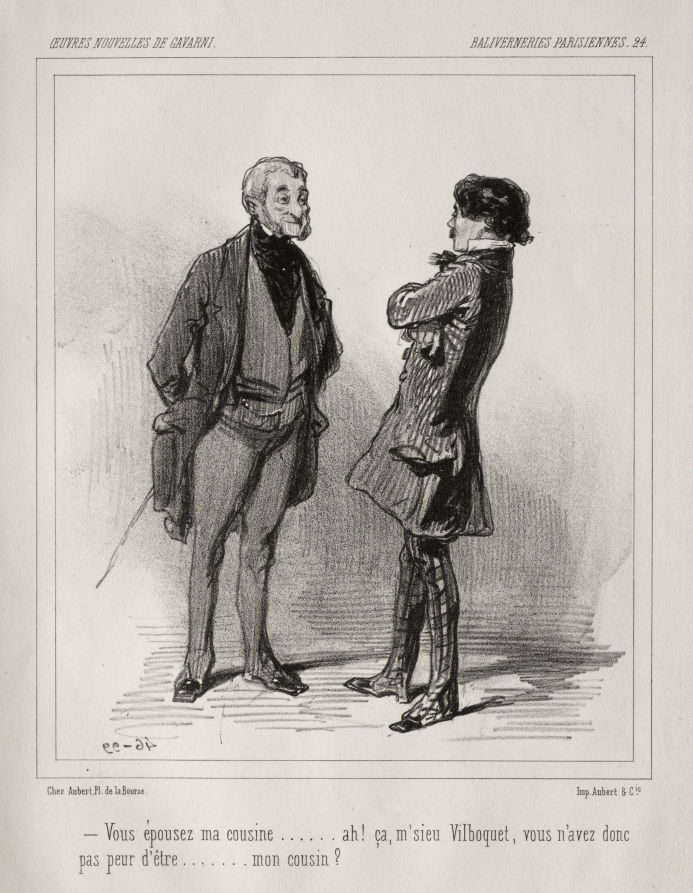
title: Baliverneries Parisiennes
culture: France, 19th century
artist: Paul Gavarni (French, 1804–1866)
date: c. 1847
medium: lithograph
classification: Print